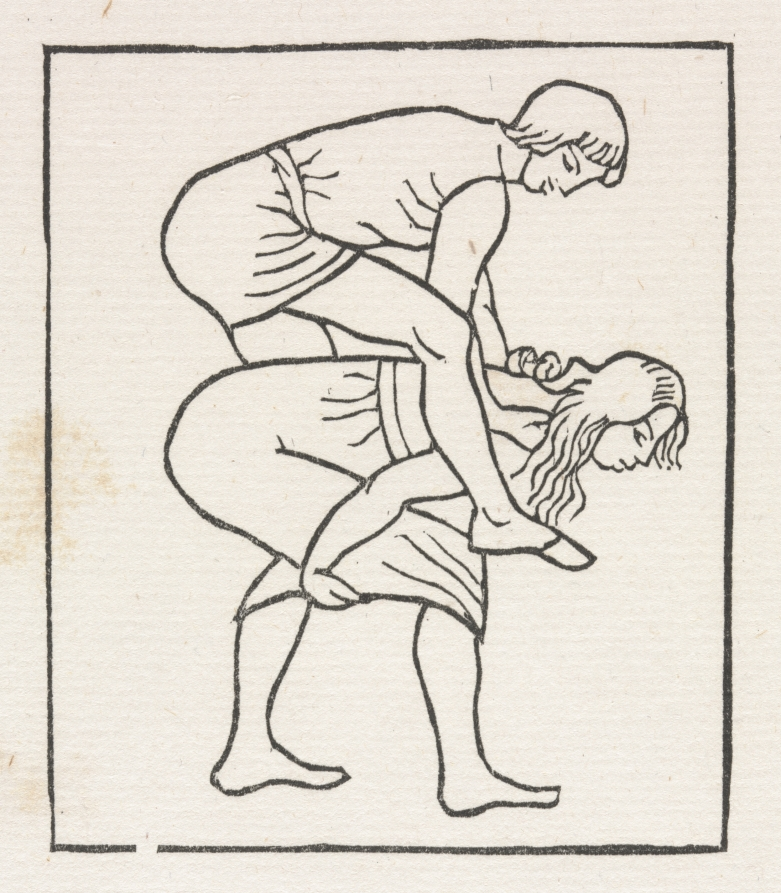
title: Daphnis and Chloe: Daphnis Puts the Apple into Chloe's Bosom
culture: France, 20th century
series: similiar to Daphnis and Chloe, Pantheon Books Inc., 1949 p. 145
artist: Aristide Maillol (French, 1861–1944)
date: 1937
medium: woodcut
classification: Print